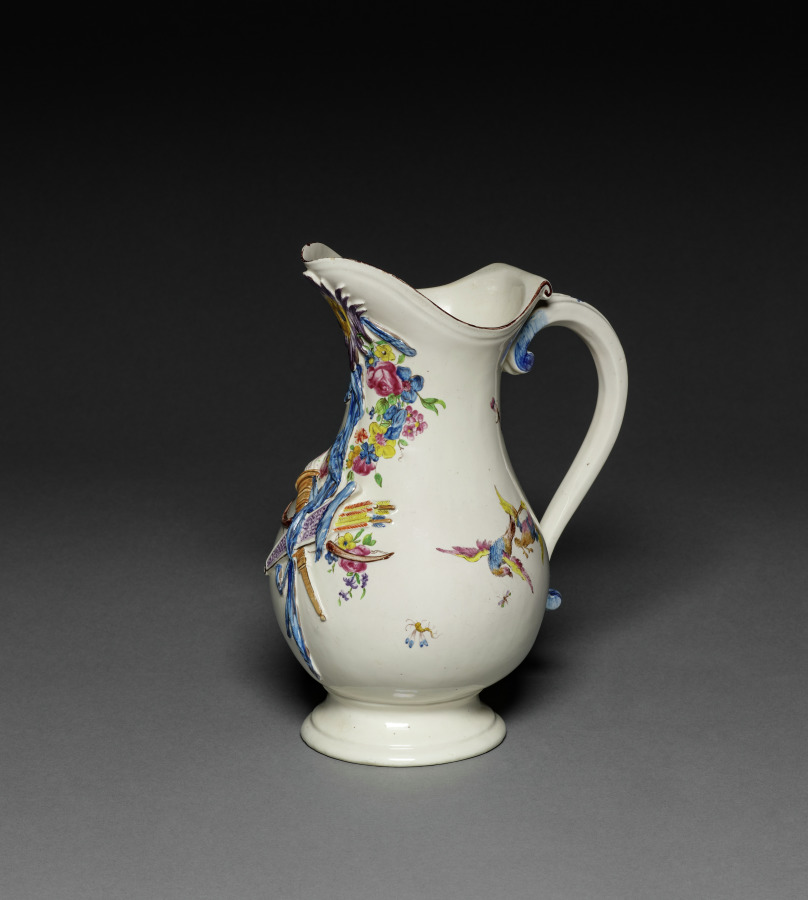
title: Ewer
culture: France, Chantilly, 18th century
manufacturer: Chantilly Porcelain Factory (French)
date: c. 1770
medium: soft-paste porcelain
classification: Ceramic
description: On the basis of the style of its decoration, particularly the symbolic trophies of love derived from the repertoire of classic ornament, this ewer and basin can be dated c. 1770. At this period, the output of the Chantilly factory was largely restricted to comparatively utilitarian table wares; pieces such as these are quite rare.